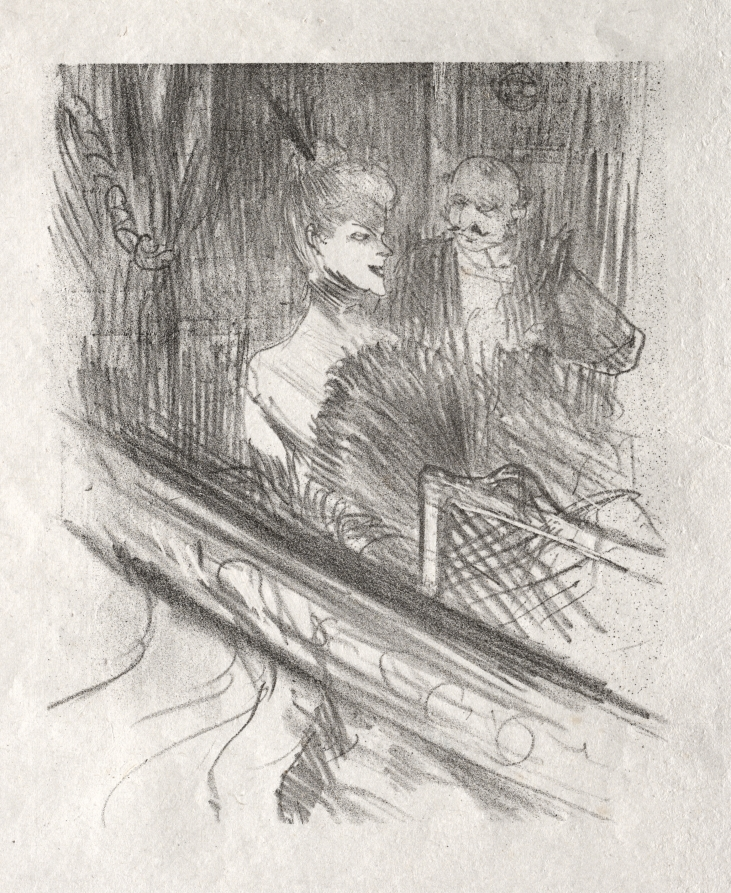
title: Au pied du Sinaï: Le Baron Moïse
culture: France, 19th century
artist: Henri de Toulouse-Lautrec (French, 1864–1901)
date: 1898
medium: lithograph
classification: Print